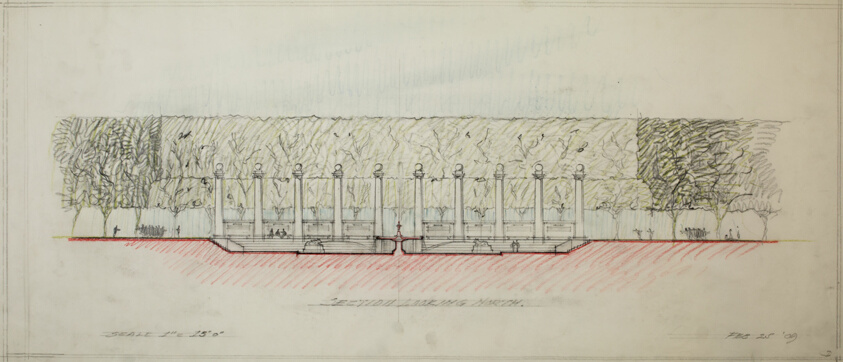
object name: Architectural Drawing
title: Potomac Round Point, Washington D.C., Section Sketch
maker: D. H. Burnham & Co.; American, 1891-1912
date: 1909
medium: Graphite and colored pencil on tracing paper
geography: Washington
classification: design drawing; architectural drawing